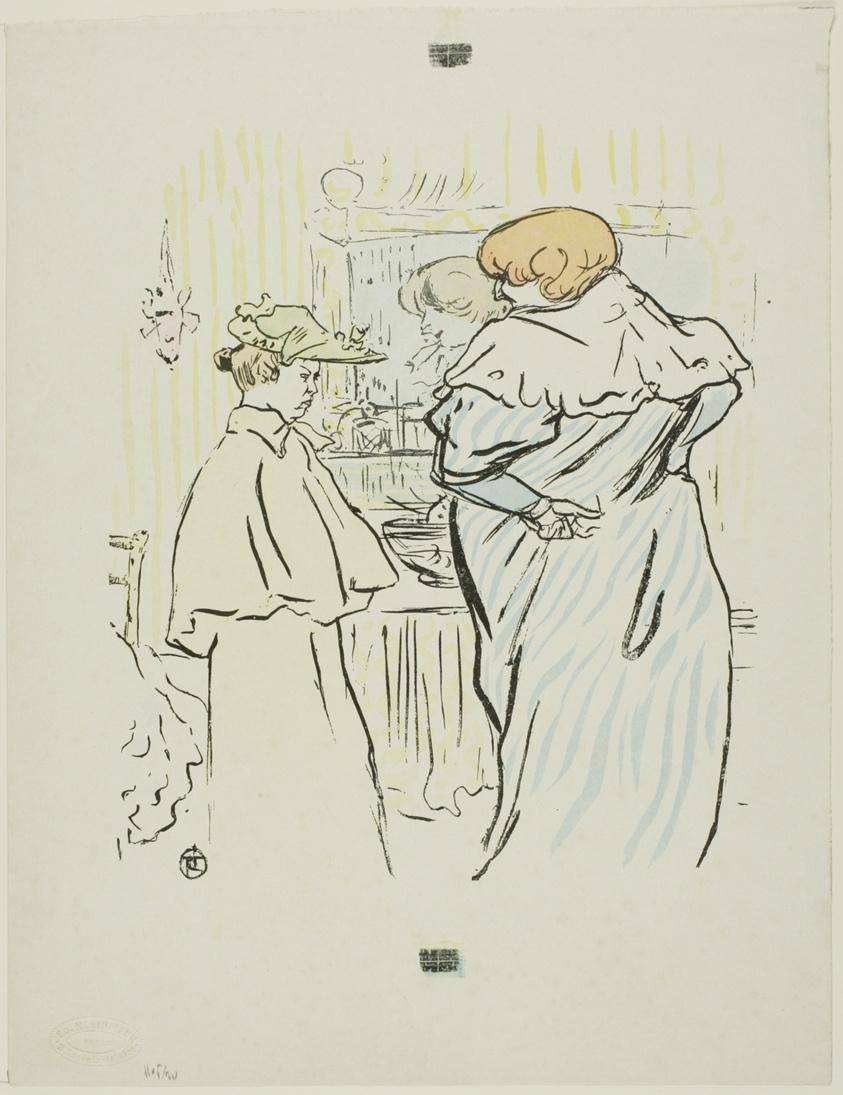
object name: Print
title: So You are Experienced?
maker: Henri de Toulouse-Lautrec, after; French, 1864-1901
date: published January 9, 1897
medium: Color photorelief on coated ivory wove paper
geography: France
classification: photorelief; print; prints and drawing